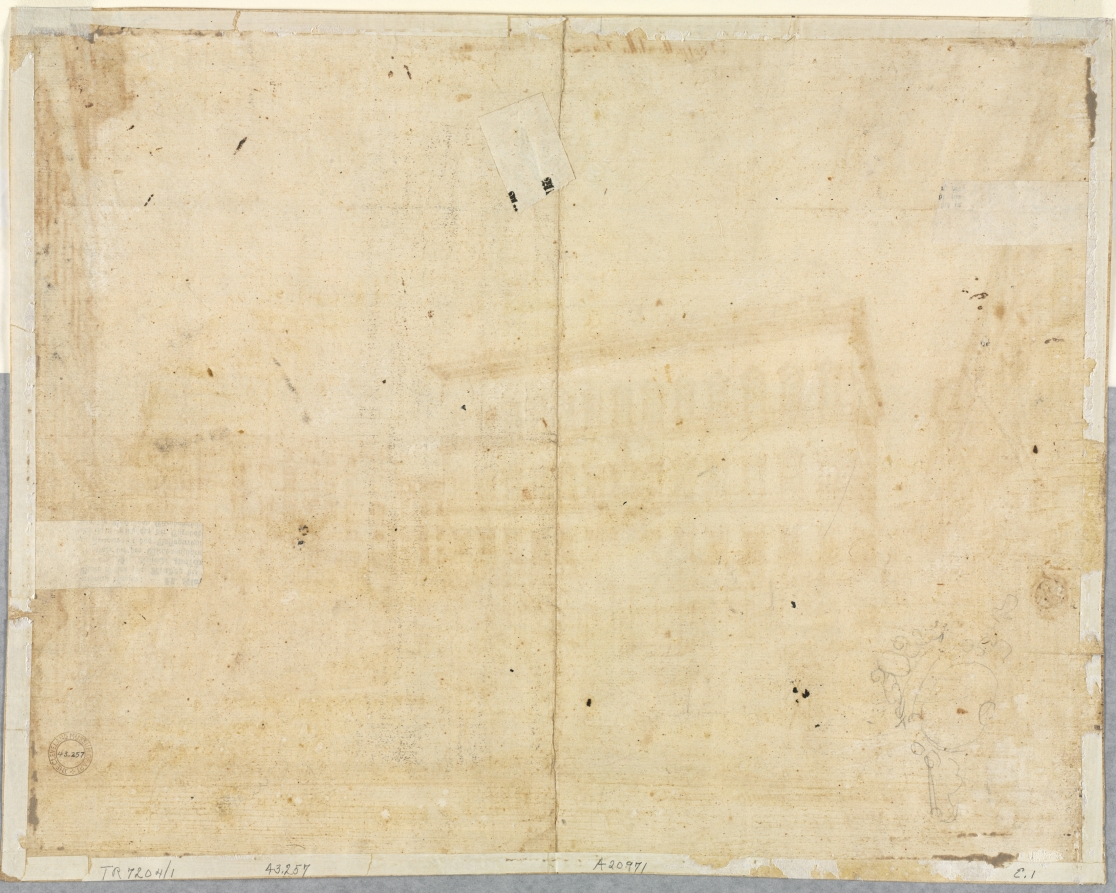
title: Cartouche (verso)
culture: Flanders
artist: Lievin Cruyl (Flemish, c. 1640-c. 1720)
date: 1664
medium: graphite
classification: Drawing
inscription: ON STRIPS OF PAPER MOUNTED TO PERIMETER, lower center, in graphite: A20971 ; lower right, in graphite: E. 1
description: Flemish artist Lieven Cruyl made a number of drawings of emblematic vistas of Rome for the Roman publisher Giovanni Battista de Rossi, of which ten were published as etchings in 1666. The Piazza Farnese features architecture designed by Michelangelo, who completed the Palazzo Farnese after the death of its original designer, Antonio da Sangallo, in 1546. His main contribution was the third story and the significantly protruding cornice at the top of the facade, which dramatically hangs over the front of the building, like sculpture.